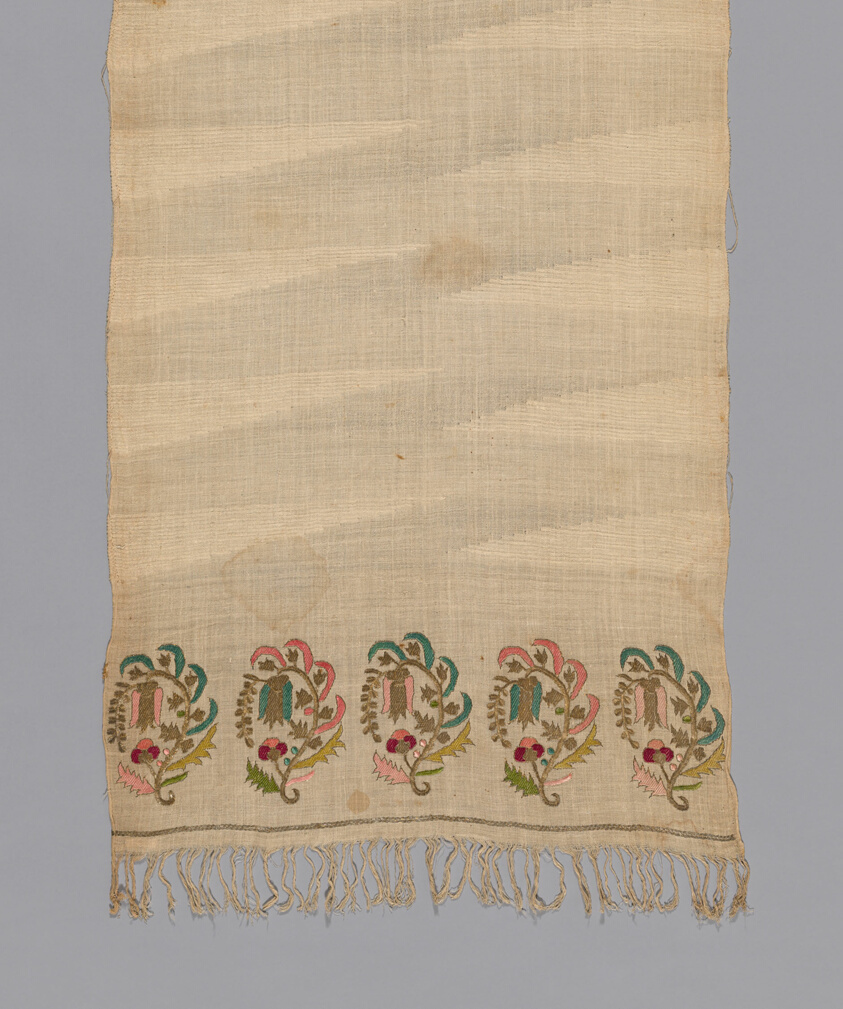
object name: Textile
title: Towel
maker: Turkey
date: 1875/1900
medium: embroidered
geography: Turkey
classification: textile; needlework (visual works); weaving